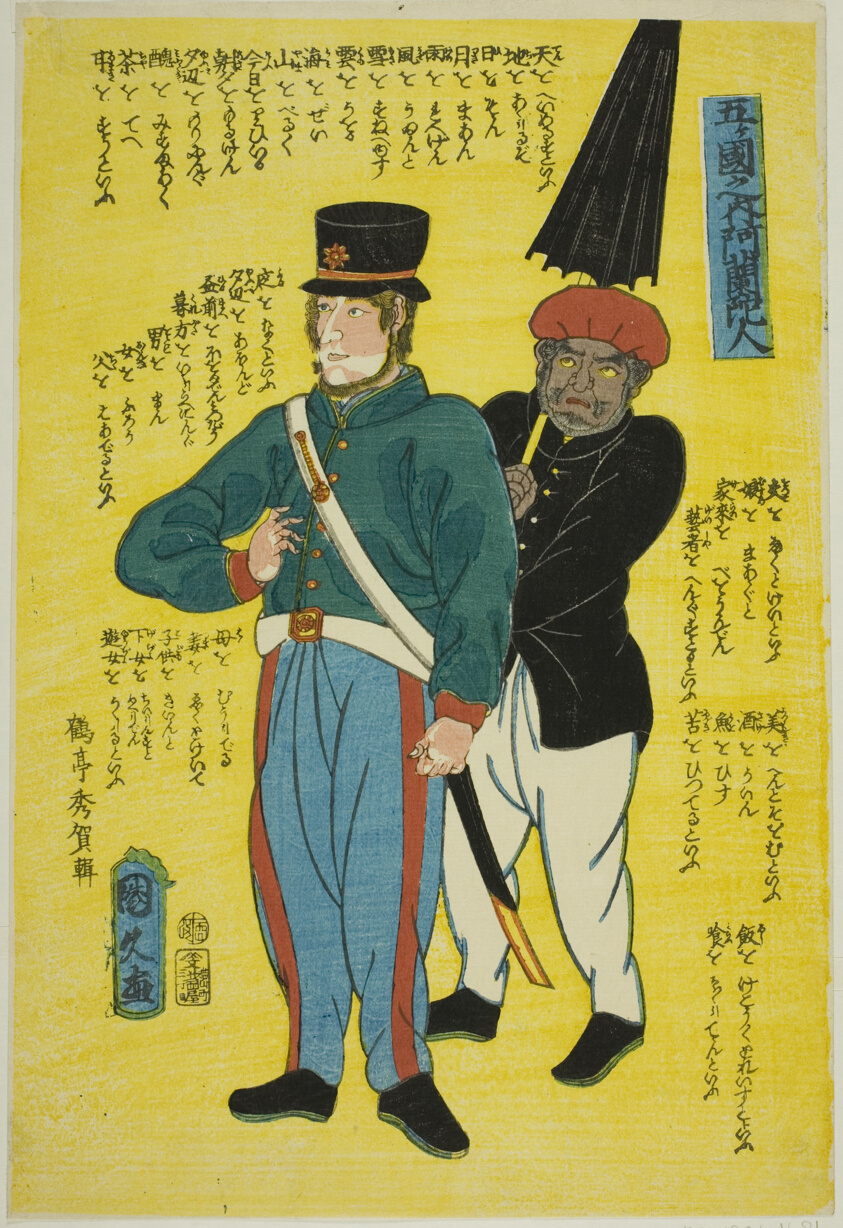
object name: Print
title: Dutch (Orandajin), from the series "People of the Five Nations (Gokakoku no uchi)"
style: Japanese (culture or style)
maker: Utagawa Kunihisa II (Japanese, 1832–1891)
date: 1861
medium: Color woodblock print; oban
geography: Japan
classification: woodblock print; print; asian art